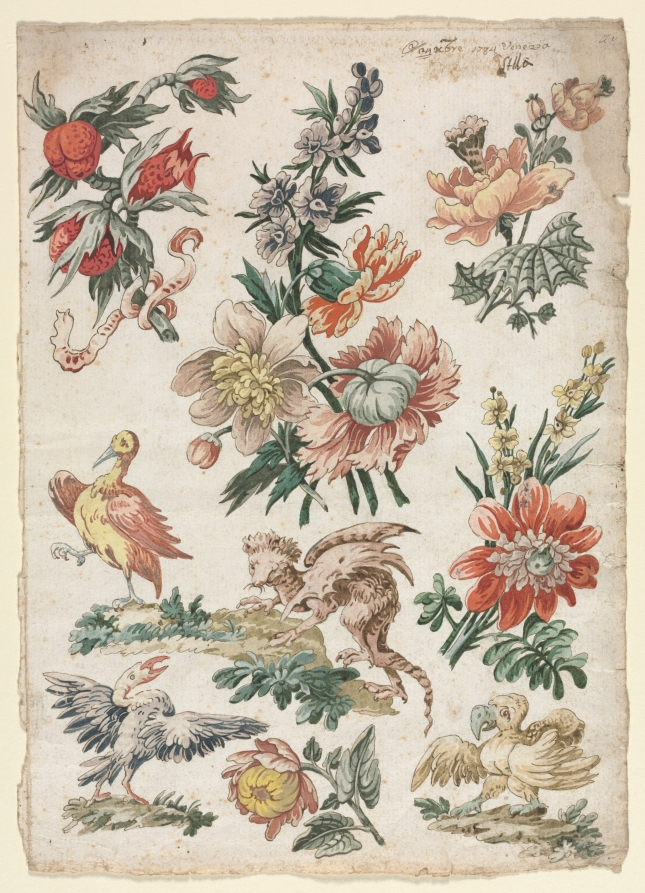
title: Floral Designs with Birds and Griffon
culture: Italy, 18th century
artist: Giacomo Cavenezia (Italian)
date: 1784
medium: pen and brown ink, brush and brown amd gray wash, watercolor and gouache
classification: Drawing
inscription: by artist, upper right, in brown ink: @ [underlined] 24 [underlined twice] xbre 1784. [the 8 was altered from a 7] Venezia ; by artist, upper right, in brown ink: [Uc?] ; upper right, in brown ink: Stlla